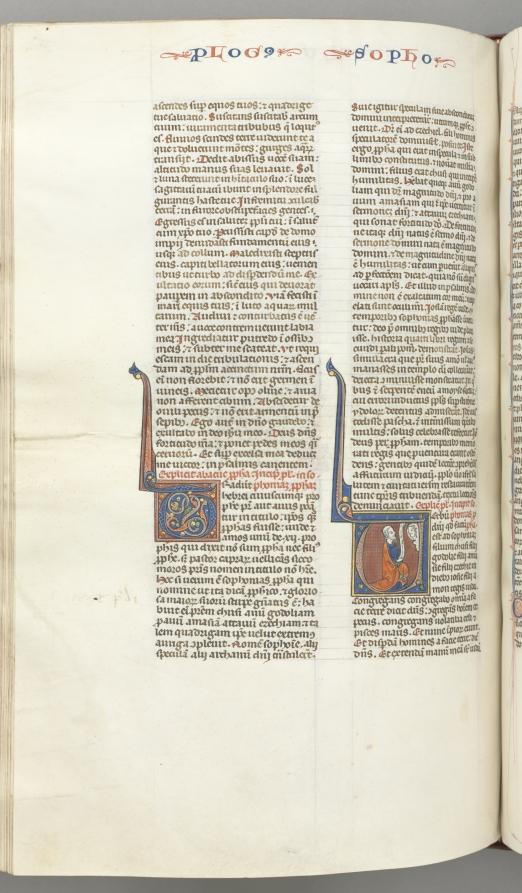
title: Fol. 362v, Zephaniah, historiated initial V, Zephaniah kneeling with a scroll, bust of God above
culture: Southern France, Toulouse(?), 13th century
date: c. 1275–1300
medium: ink, tempera and gold on vellum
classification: Bound Volume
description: Biblical manuscripts were highly prized and important possessions of churches, monasteries, cathedral schools, and universities throughout medieval Europe. The biblical texts were known as the vulgate, the translations made by Saint Jerome in the fourth century from Hebrew and Greek into Latin, which became the definitive and official Latin version of the Roman Church. In the 13th century, the bible was, for the first time, produced as a single volume with an officially sanctioned sequence to its books and chapters as illustrated by this example. The very extensive decoration of this bible is arranged hierarchically to indicate the relative importance of the various texts so that full or almost full-page initials mark the openings of the first prologue, Genesis, and the first Gospel; historiated initials mark the beginning of each book and illuminated initials mark the Prologues.